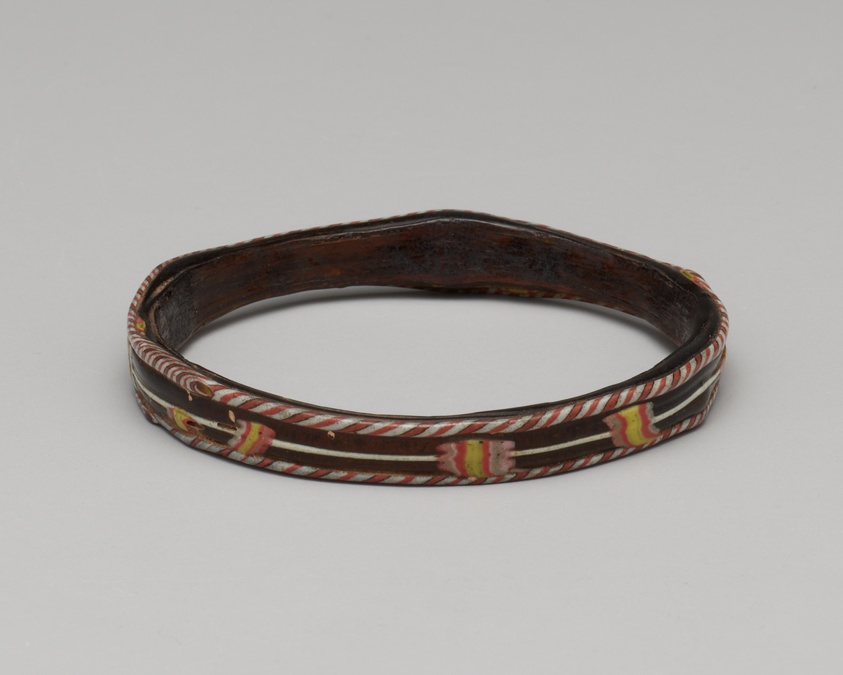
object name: Costume and Accessories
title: Bracelet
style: greco-roman (egyptian)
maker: Islamic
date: 14th-15th century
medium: Glass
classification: glass; jewelry; ancient art; costume